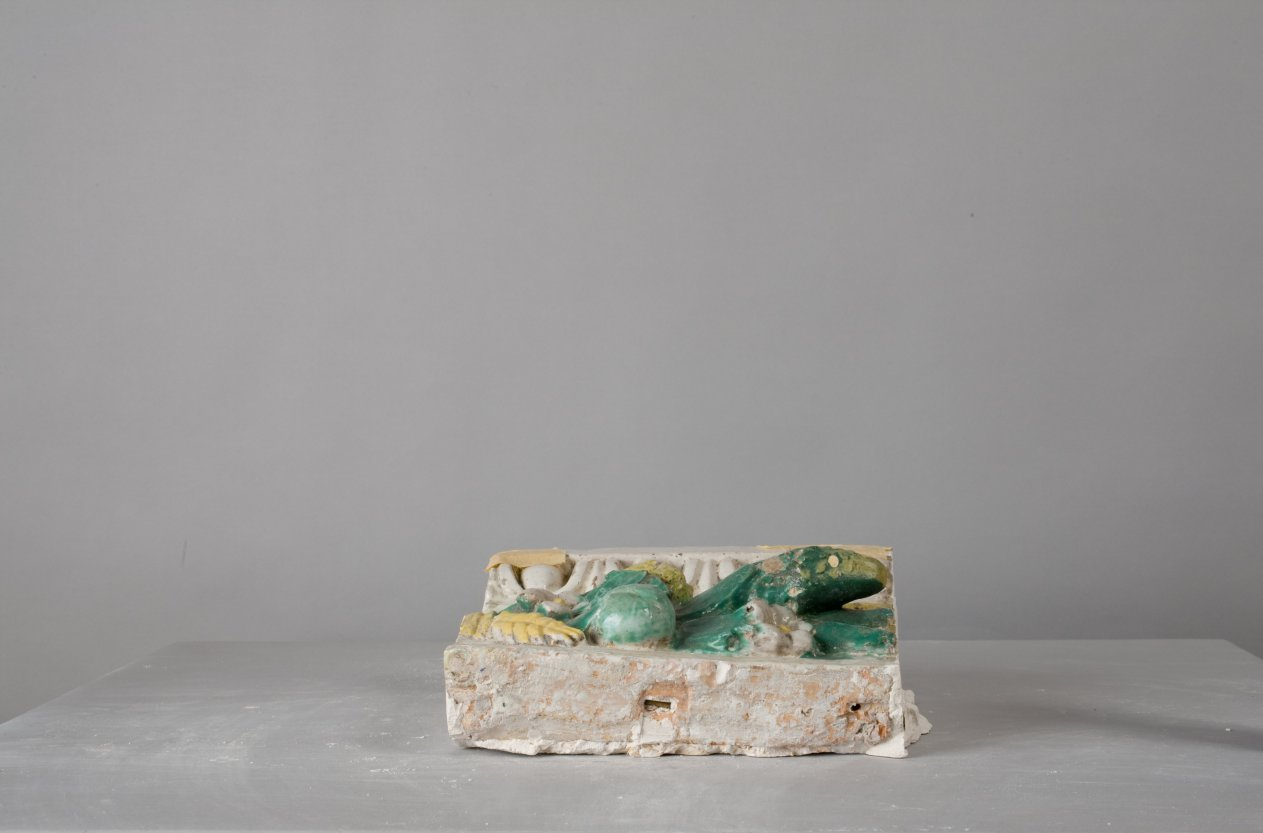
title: Fragment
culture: Italy, Florence, 16th century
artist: Benedetto Buglioni (Italian, 1461–1521)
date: c. 1900–1910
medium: glazed terracotta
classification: Sculpture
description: The Madonna sits upon a throne with the Christ Child standing on her knee. He is steadied by his mother, turning delicately to grasp the Virgin's robe for support. On the left is St. Francis, identified by his stigmata. On the right, St. Anthony Abbot is identified by his monk's robe and T-shaped walking stick. The brown robes of the saints, the purple of the Virgin's tunic (a shade characteristic of the artist), and the flesh tones of the figures contrast strongly against the bright blue background. In the semicircular sky behind the figures, three winged cherub heads emerge, representing a host of angels. The inclusion of St. Francis in this altarpiece honors the saint, suggesting that the altarpiece may have been originally built into the wall of a Franciscan institution in Tuscany. Two shields bearing the Borgherini family crest appear in the lower portion of the altarpiece's border, further suggesting that the chapel for which this altarpiece was made was likely owned or endowed by the family. Glazed terracotta is both durable and decorative and the gleaming white of this piece would have stood out in the darkness of a church. The medium was made popular by Renaissance artist Luca della Robbia and came into fashion as a substitute for expensive carved marble. A rounded arch frame embellished with fruit and flower garlands as well as egg-and-dart and cord moldings accompanied the work when it was acquired, but was later determined not to be original and removed. Buglioni's work bears the influence of the della Robbias, particularly in the simple color scheme. Buglioni likely worked in the studio of Luca's nephew, Andrea, where he would have learned the technique of glazing terracotta.